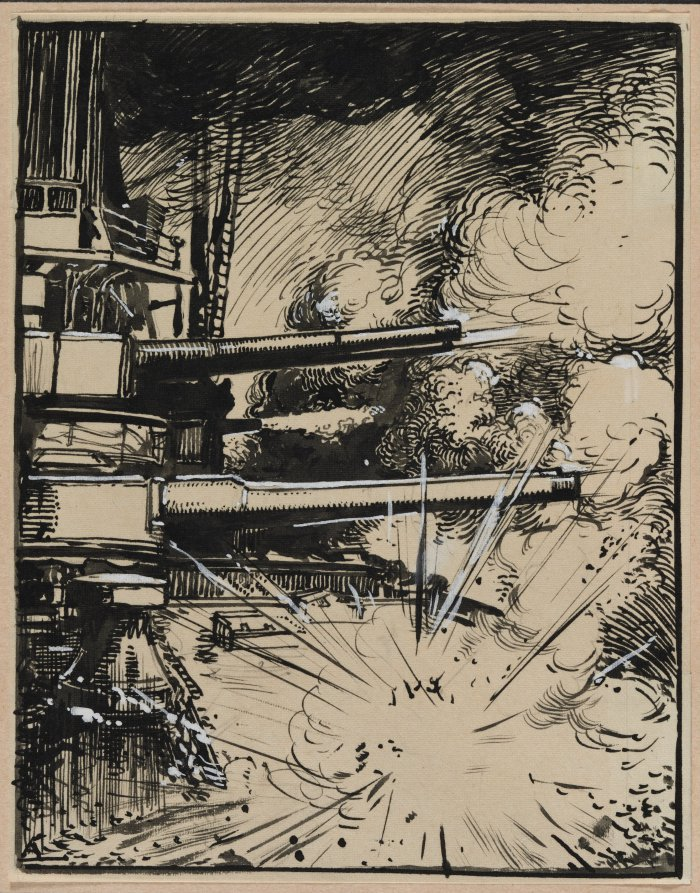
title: Bombe explosant sur un cuirasse aux canons braques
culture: France, 20th century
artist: Auguste Louis Lepère (French, 1849–1918)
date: 1914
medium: brush and black ink over pencil with white highlights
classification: Drawing